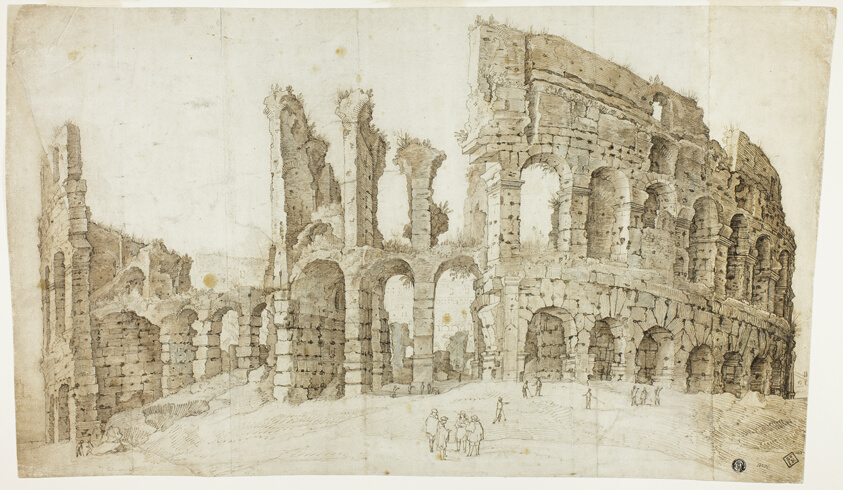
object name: Drawing and Watercolor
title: Ruins of the Colosseum in Rome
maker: Circle of Willem van Nieuwlandt, II; Flemish, c.1584-after 1635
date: c. 1600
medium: Pen and brown ink, with brush and brown and gray wash, on pieced cream laid paper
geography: Flanders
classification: ink or chalk wash; drawings (visual works); prints and drawing